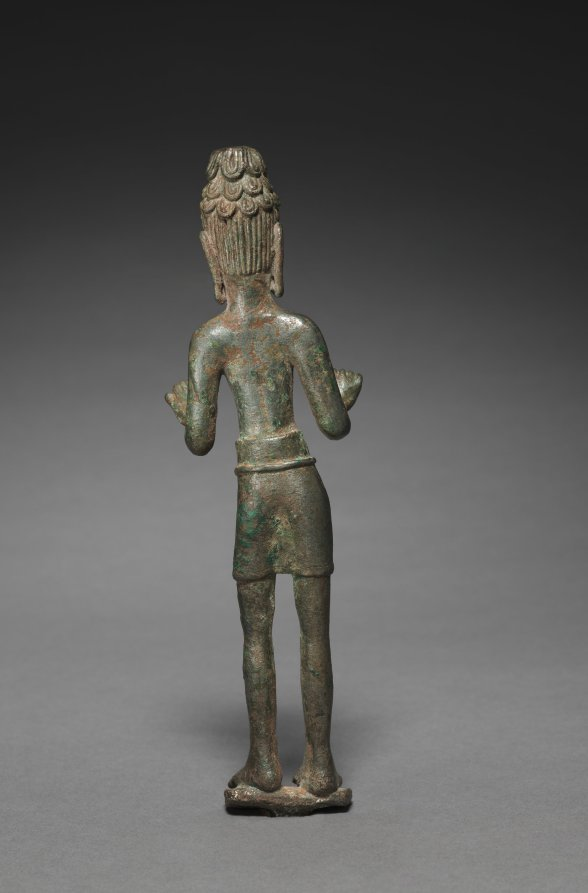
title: Bodhisattva Avalokiteshvara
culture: Northeastern Thailand, Khorat Plateau, Buriram Province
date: 600s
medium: bronze and silver alloy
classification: Sculpture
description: This rare image survives from the early phase of Buddhist sculpture in Southeast Asia. Made in what is known as the Pra Khon Chai style, it has the characteristic sensitivity of expression, slender physique, and looped locks of hair. This figure once held a lotus flower in the right hand and flask in the left—identifying features of Avalokiteshvara in this region.